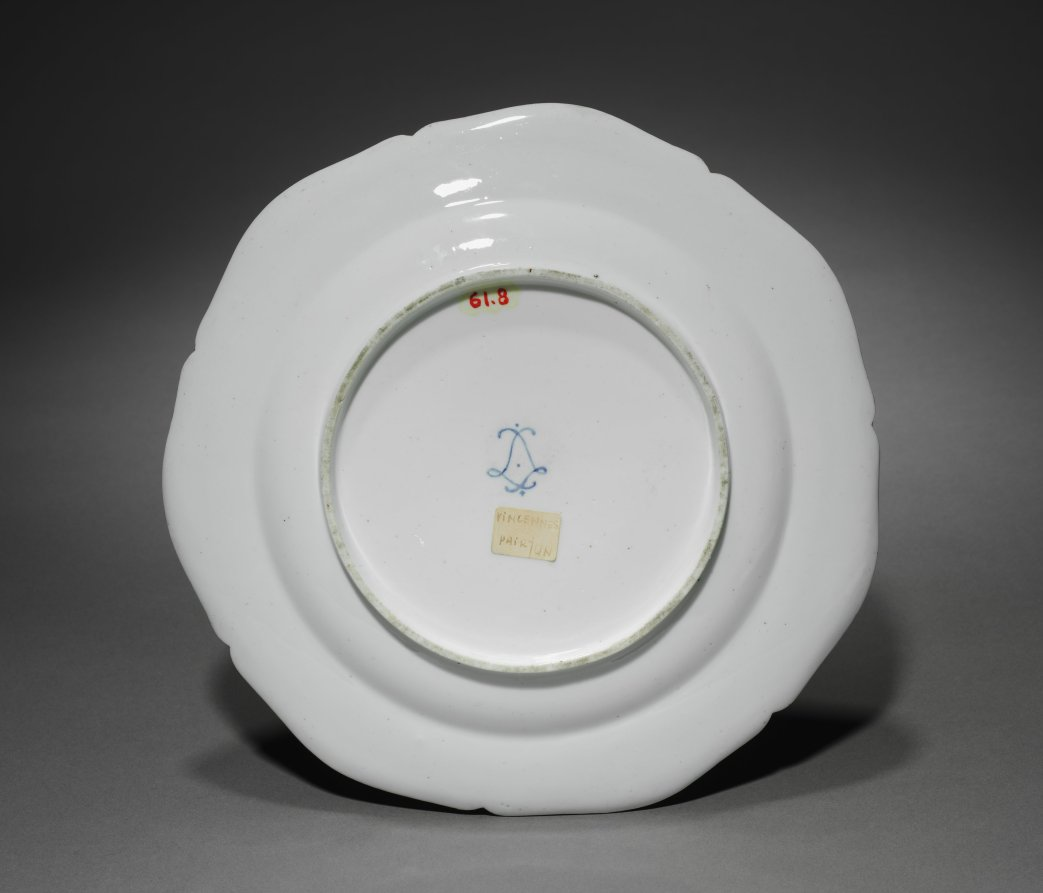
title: Plate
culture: France, Vincennes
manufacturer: Vincennes Porcelain Factory (France, 1740–56)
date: c. 1748–51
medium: porcelain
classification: Ceramic